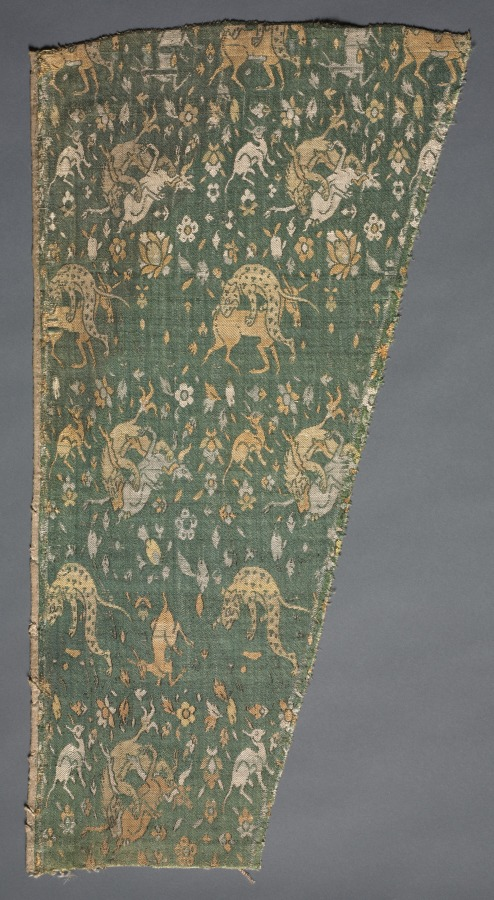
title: Lampas with scenes of wild animals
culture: Iran, Safavid period (1501–1722)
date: late 1500s–early 1600s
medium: Silk and gilt-metal thread: lampas, brocaded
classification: Textile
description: Amidst small floral motifs, deer, and antelopes, cheetahs in one row attack deer, while in the alternating row lions seize wild asses.